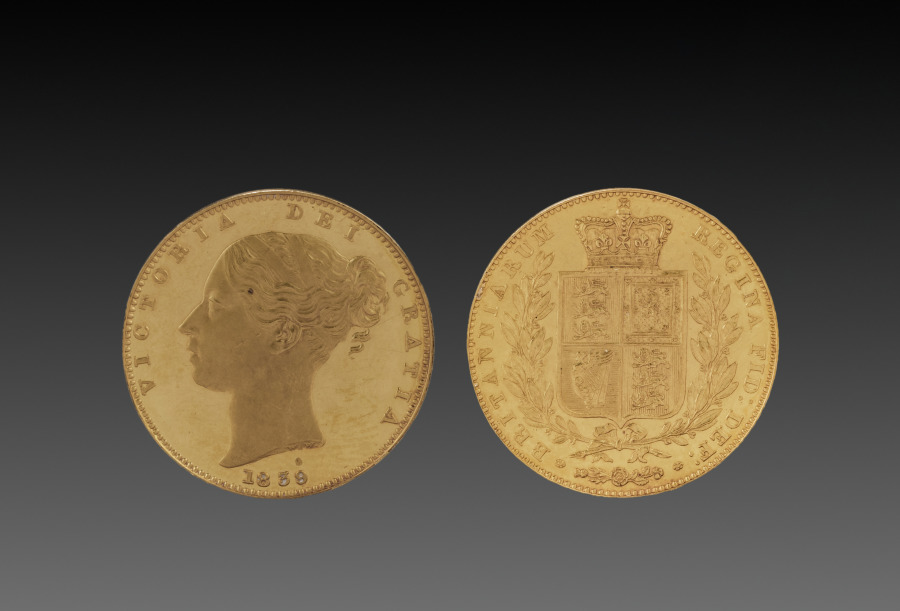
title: Sovereign: Victoria (obverse); Shield of Arms (reverse)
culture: England, Victoria, 1837-1901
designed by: William Wyon (British, 1795–1851)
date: 1839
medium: gold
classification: Coins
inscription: VICTORIA DEI GRATIA; below: 1839.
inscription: BRITANNIARUM REGINA FLD DEF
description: With the end of the rule of the House of Hanover, whose last direct representative on the British throne was William IV (died 1837), the royal arms that had ceased to show the French pretention at the end of the first coinage of George III were now further simplified. In each quarter from top right to bottom left: 1. England; 2. Scotland; 3. Ireland; 4. England.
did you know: William Wyon was the official chief engraver at the Royal Mint from 1828 until his death.